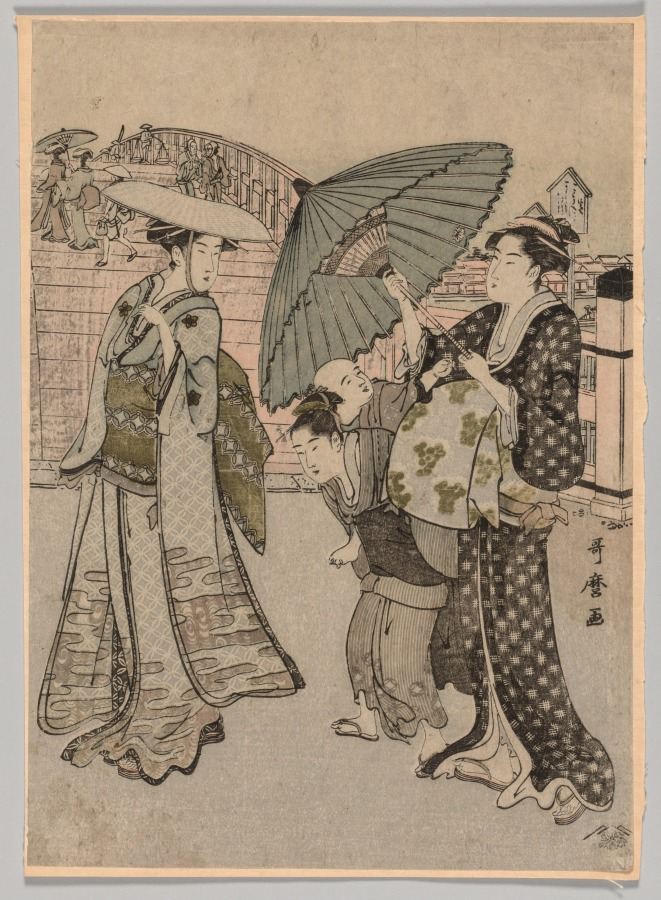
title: No Title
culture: Japan, Edo period (1615–1868)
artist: Kitagawa Utamaro (Japanese, c. 1754–1806)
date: 1753–1806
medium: color woodblock print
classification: Print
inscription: Signature: Utamaro, gwa